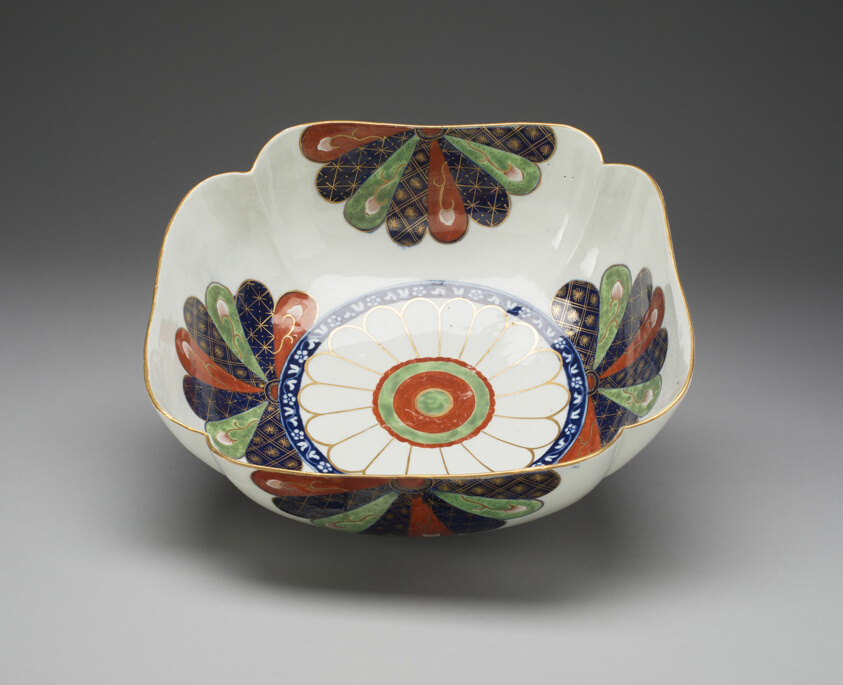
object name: Ceramics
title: Dish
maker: Worcester Porcelain Factory (Warmstry House Period, 1751–1783); Worcester, England, founded 1751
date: 1765/75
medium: Soft-paste porcelain, polychrome enamels and gilding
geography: Worcester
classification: dish (vessel); tableware; ceramics; porcelain; european decorative arts